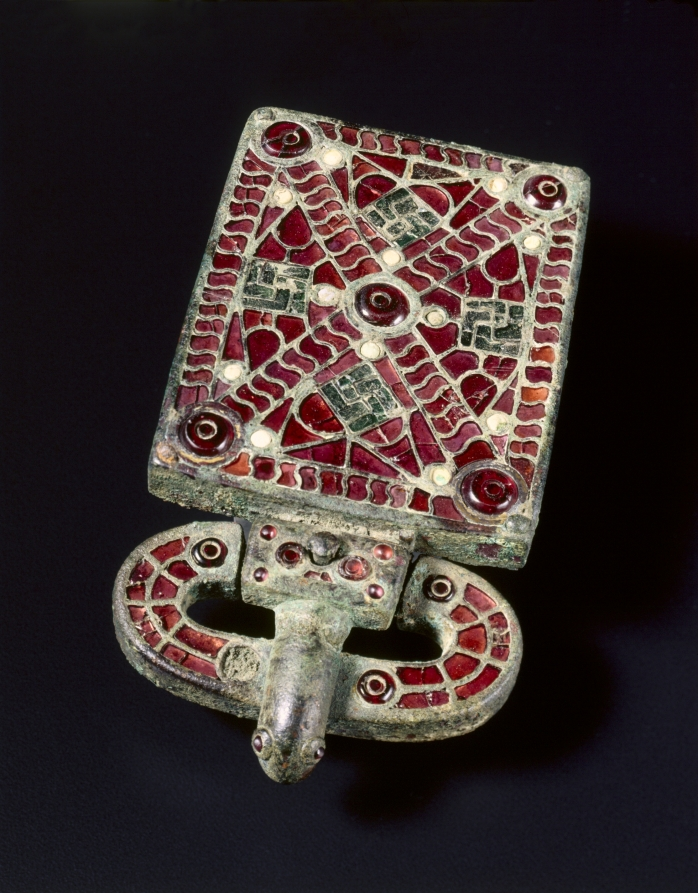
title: Belt Buckle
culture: Visigothic, Spain, Migration Period, 6th century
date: c. 525–560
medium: bronze with garnets, glass, mother of pearl, gold foil, traces of gilding; bronze and glass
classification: Jewelry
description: The art of the European Migration Period (3rd-7th centuries AD) is almost exclusively one of personal adornment-a portable art that followed men and women to their graves. Belt buckles with large rectangular attachment plates have been discovered in cemeteries across the Iberian Peninsula-now occupied by Spain and Portugal-from the period of Visigothic occupation (about AD 412-711). Their decoration varies. Finer examples, like this one, are distinguished by brilliantly inlaid semi-precious stones and colored glass. Garnets were especially prized in Visigothic society for use in cloisonné jewelry. The technique involved the fitting of carefully cut pieces of polished garnet into an intricate grid of compartments, or cloisons. This buckle is so densely inlaid with garnets that it presents a virtual "carpet" of red to the eye. These large Visigothic buckles are strikingly uniform in shape yet endlessly varied in surface design, perhaps a sign that they expressed the personal identities of their original owners. Grave excavations have shown that belt buckles of this type were made for women.